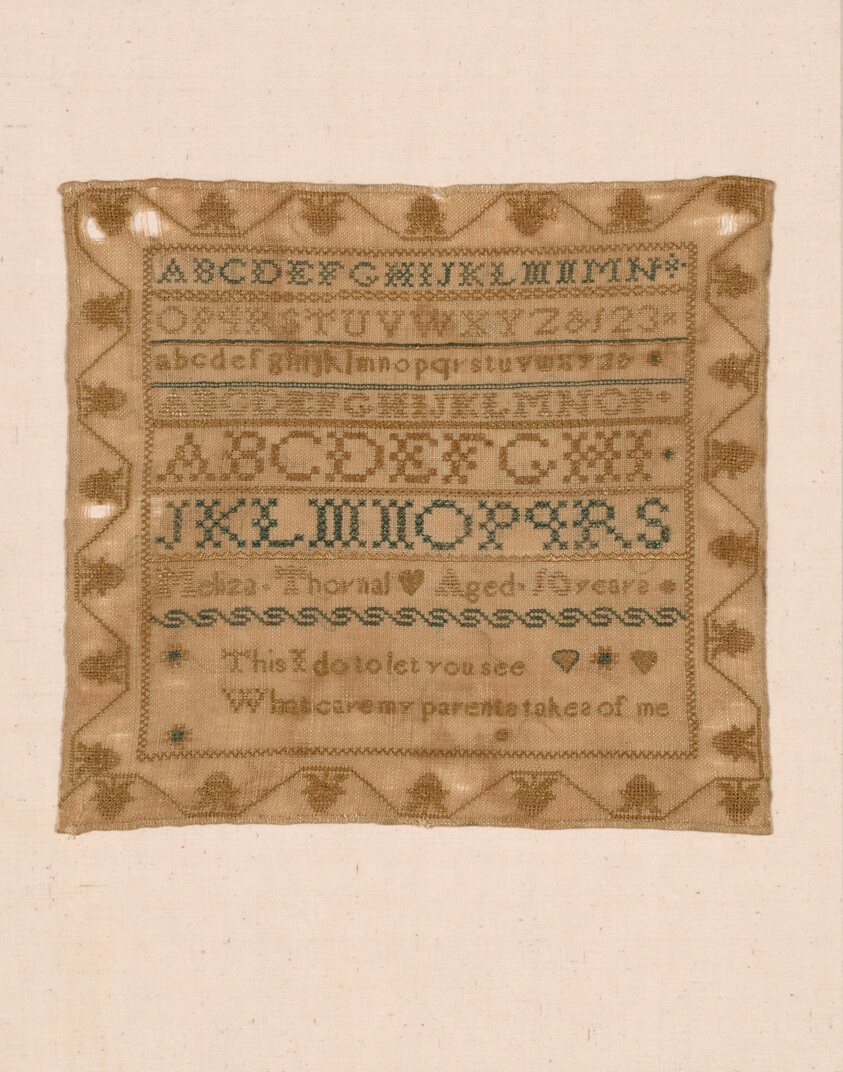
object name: Textile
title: Sampler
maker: Meliza Thornal (American, active c. 19th century); United States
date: 19th century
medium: Silk, plain weave; embroidered with silk in cross stitches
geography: United States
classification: textile; needlework (visual works); sampler